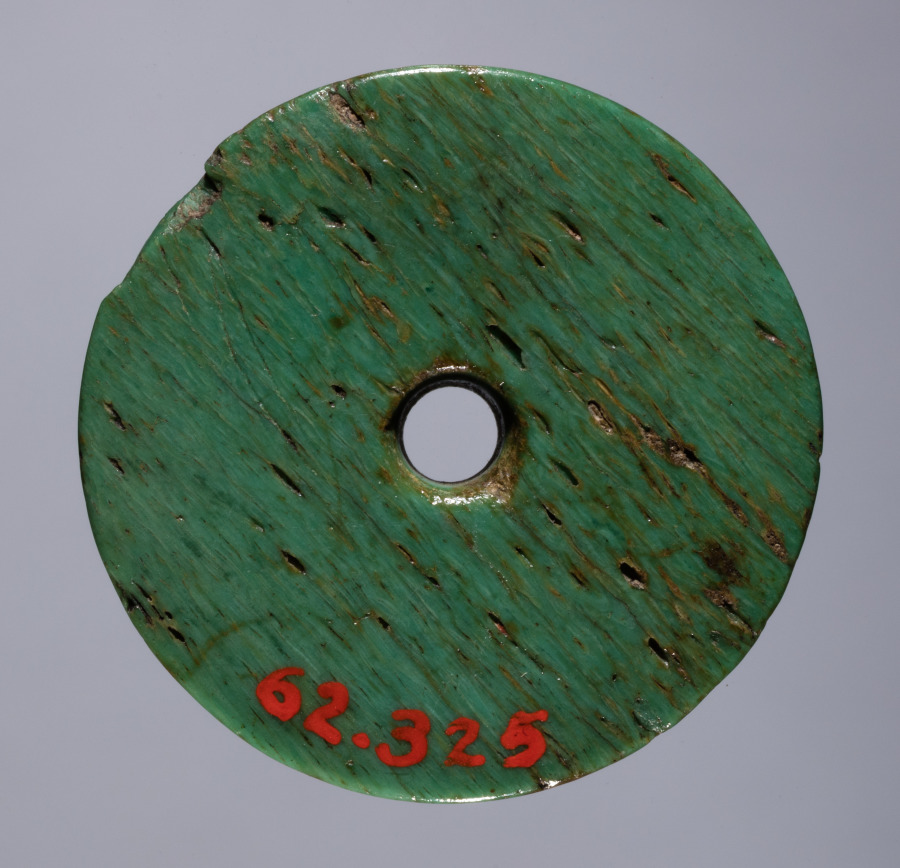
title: Spindle Whorl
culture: Iran, early Islamic period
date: 700s - 900s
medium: bone, incised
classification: Spindle Whorl